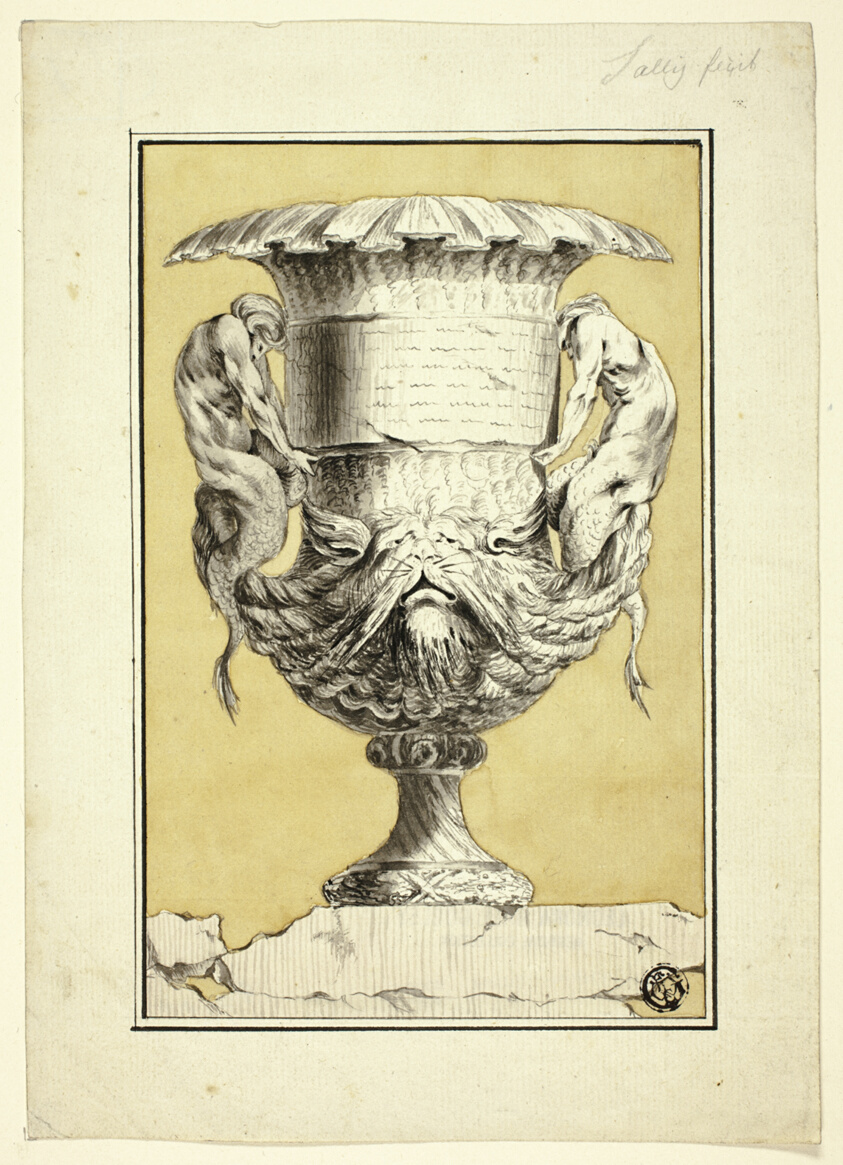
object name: Drawing and Watercolor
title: Monumental Vase with Anthropomorphic Figures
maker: Attributed to or after Jacques François Joseph Saly; French, 1717-1776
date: after 1746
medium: Pen and black ink, with brush and black, gray, yellow, and pale pink wash, on ivory laid paper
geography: France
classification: pen and ink drawings; drawings (visual works); prints and drawing